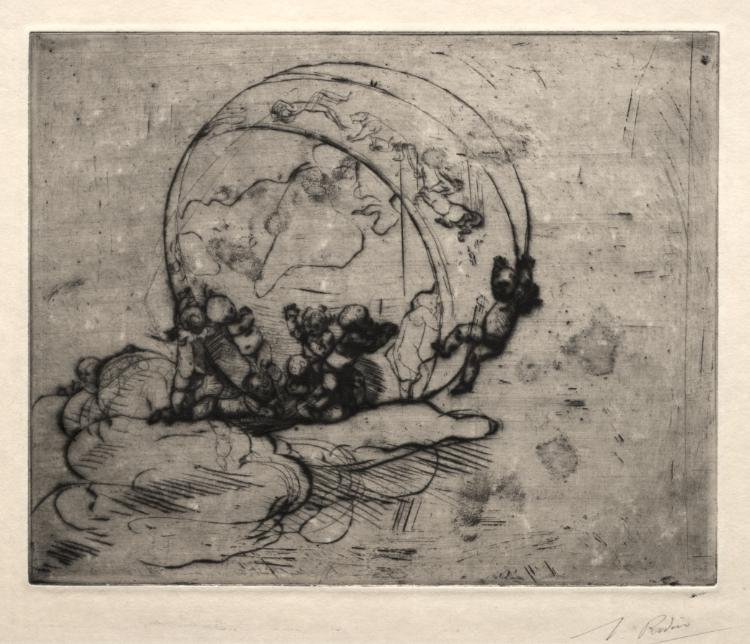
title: Cupids Leading the World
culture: France, 19th century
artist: Auguste Rodin (French, 1840–1917)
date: 1881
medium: drypoint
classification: Print